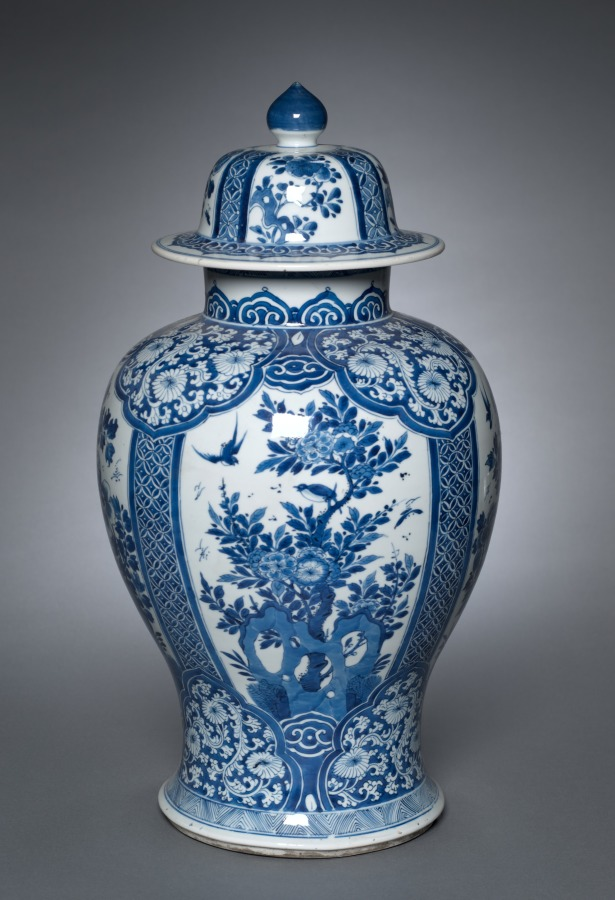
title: Vase with Cover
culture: China, Jiangxi province, Jingdezhen kilns, Qing dynasty (1644–1911), Kangxi reign (1662–1722)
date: 1662–1722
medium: porcelain with underglaze blue decoration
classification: Ceramic